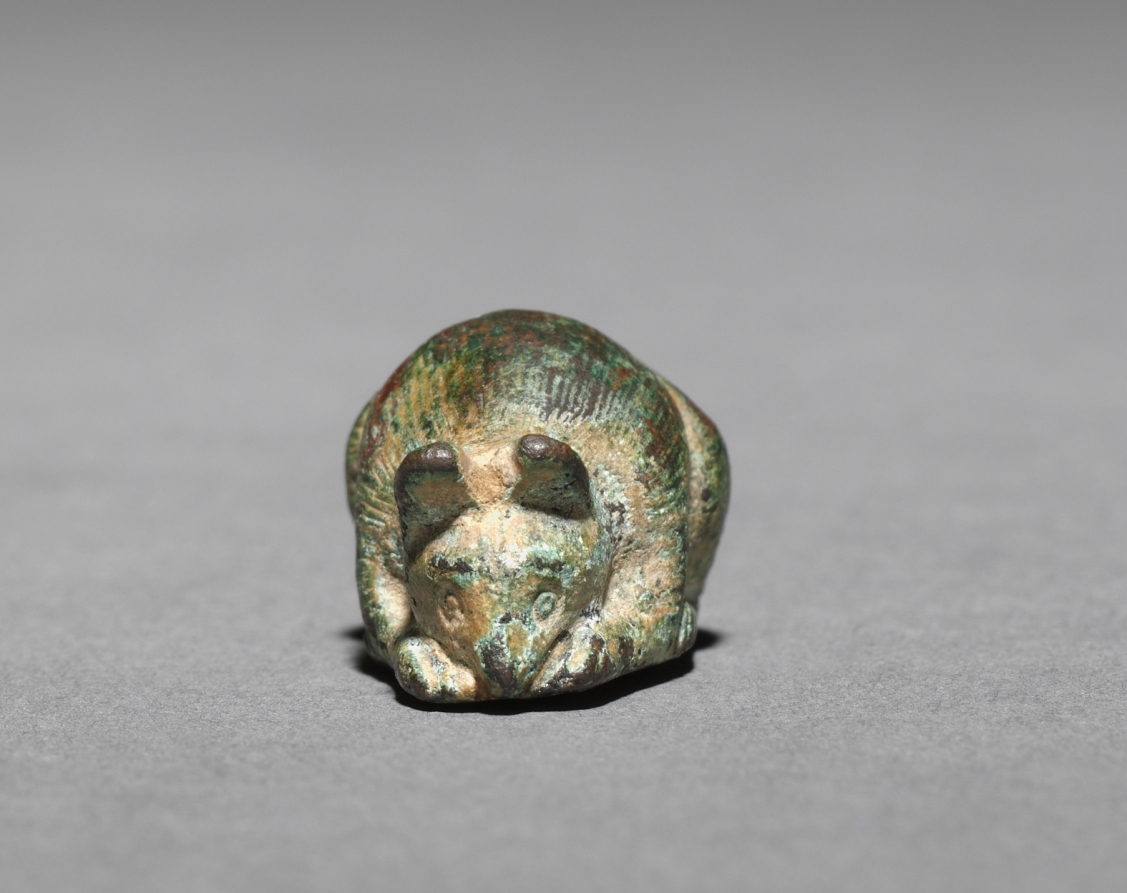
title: Mouse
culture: Italy, Rome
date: 1–200 CE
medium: bronze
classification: Sculpture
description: The Romans were the first people in antiquity to make large numbers of genre sculptures for no purpose other than household decoration. This mouse may have been just such a knick-knack or it may have ornamented a metal food container laying claim to its contents so that other mice would stay away.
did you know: Small mouse figurines were often affixed to oil lamps to ward off living mice that might eat the wicks or lamp oil